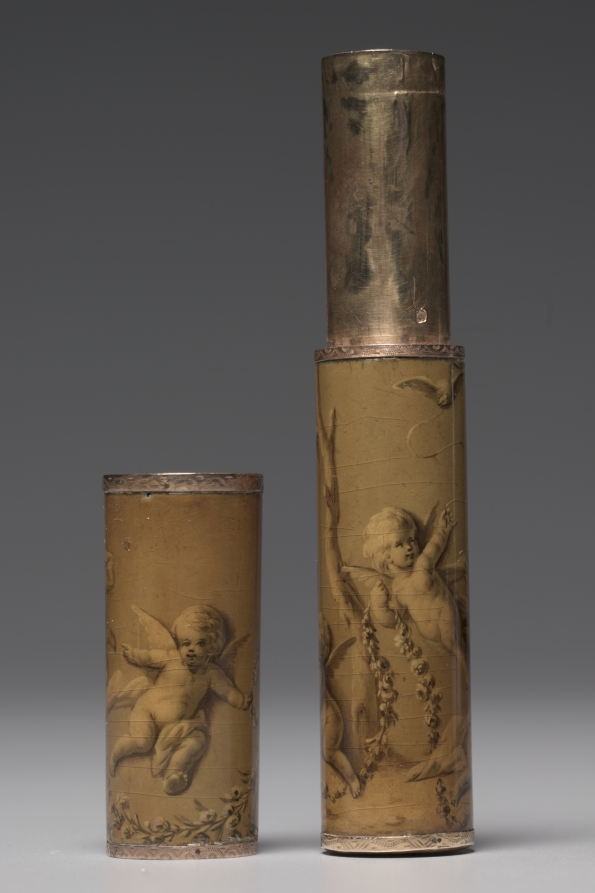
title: Needle Case (Etui à Aiguilles)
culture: France, Paris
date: 1768–69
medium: painted wood, gold mounts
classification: Miscellaneous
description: The material of cases like these delineated the status of the holder. More expensive materials such as ivory, tortoiseshell, or silver were reserved for wealthier users while more common cases were made of lacquered papier-mâché or wood. This wooden case is decorated with vernis martin, a domestic varnish imitating East Asian true lacquer. The sinuous lines, floral garlands, and putti, personifications of love in the form of winged infants, exemplify typical rococo imagery.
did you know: In the 1500s these cases were commonly fabricated to hold pins and needles for master tailors, but became more widely produced for women during the 1700s.